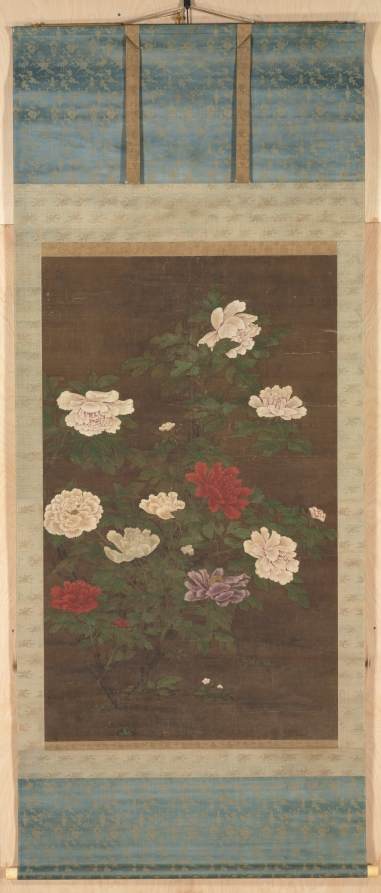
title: Peonies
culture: China, Yuan dynasty (1271-1368)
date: late 1200s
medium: hanging scroll, ink and color on silk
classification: Painting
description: In China, the peony is considered the Queen of Flowers, representing the late spring season. The shrubs of this tree peony are in full bloom, blossoming in various colors. Peony paintings were popular from the Southern Song period to the Ming dynasty. The large scale of this decorative scroll suggests that it may have been hung in a reception hall, conveying good wishes for wealth and prosperity.